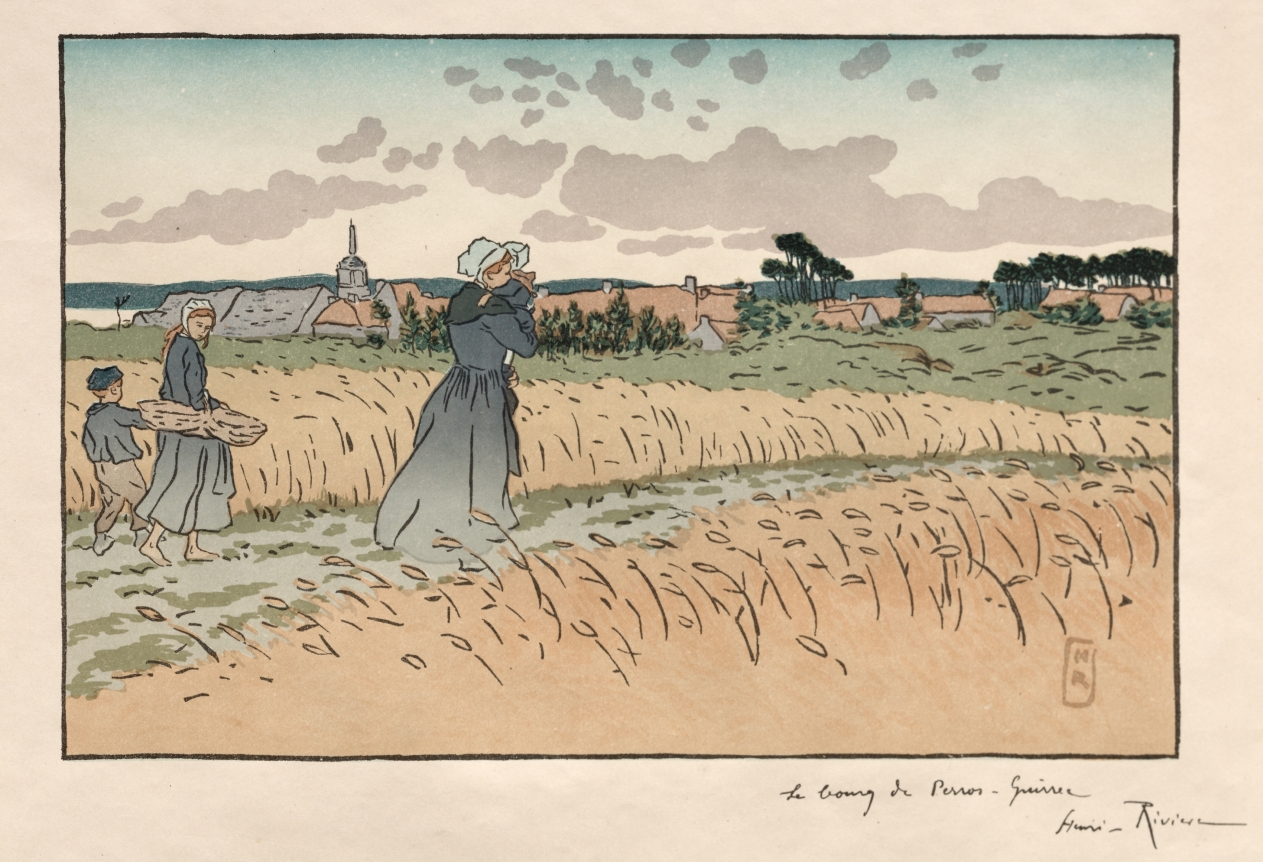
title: Parisian Landscapes: The Borough of Perros-Guirec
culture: France, 19th century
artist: Henri Rivière (French, 1864–1951)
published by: Verneau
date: 1896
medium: color lithograph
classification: Print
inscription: below image, in black ink: inscription and signature